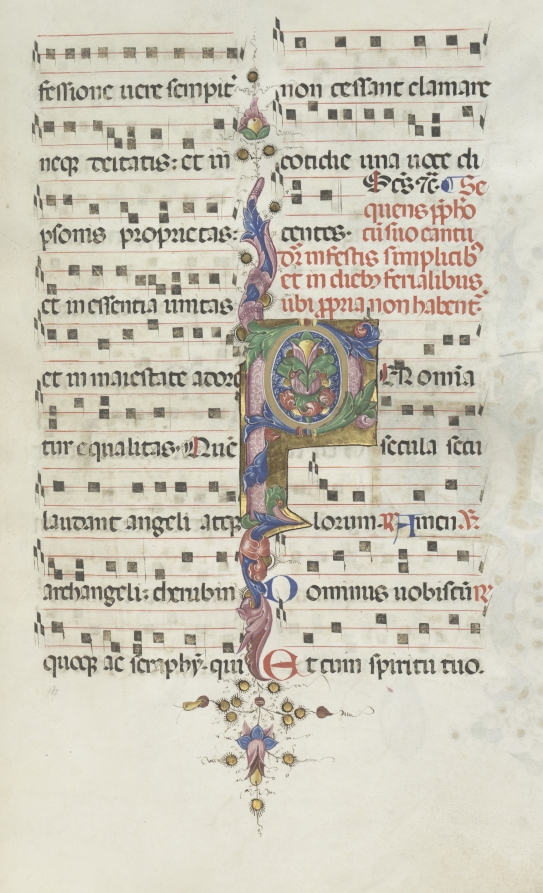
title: Missale: Fol. 183: Foliage decoration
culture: Italy, Perugia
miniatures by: Bartolommeo Caporali (Italian, c. 1420–1503)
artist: assisted by Giapeco Caporali (Italian, d. 1478)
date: 1469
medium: ink, tempera and burnished gold on vellum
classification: Bound Volume